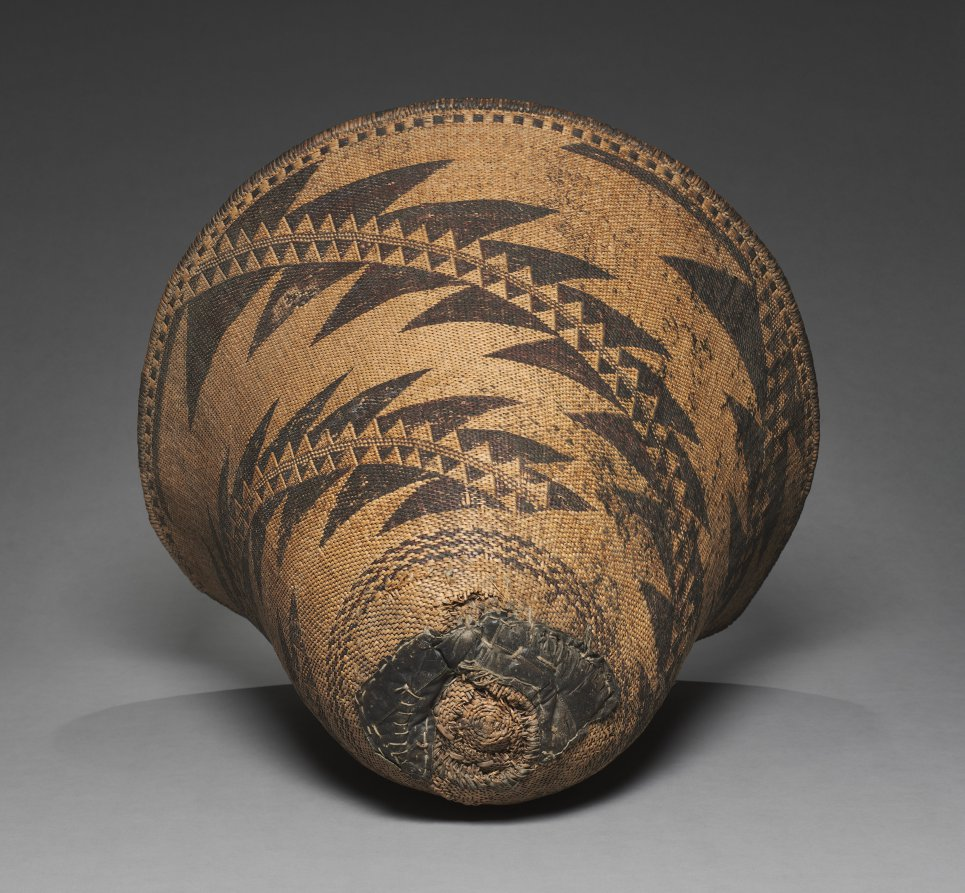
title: Burden Basket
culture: California, Pomo, central, late 19th century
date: 1880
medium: redbud, sedge; diagonal twine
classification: Basketry